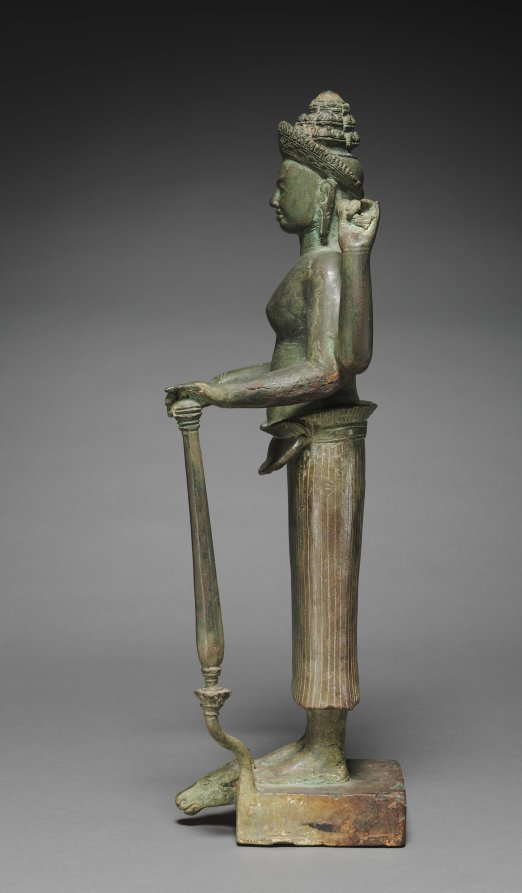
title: Durga as the Slayer of the Buffalo Demon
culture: Cambodia, probably Koh Ker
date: 900s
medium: bronze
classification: Sculpture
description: This depiction of Durga is rare and important, as it is a large-scale example of the goddess in bronze. Her conquest over the buffalo demon is indicated by its severed head at her feet. She stands four-armed and triumphant, with a wheel, conch shell, mace, and clod of earth in her hands.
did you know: The figure wears a head-dress, kirita-makuta, a diadem tied in the back and pointed at top.